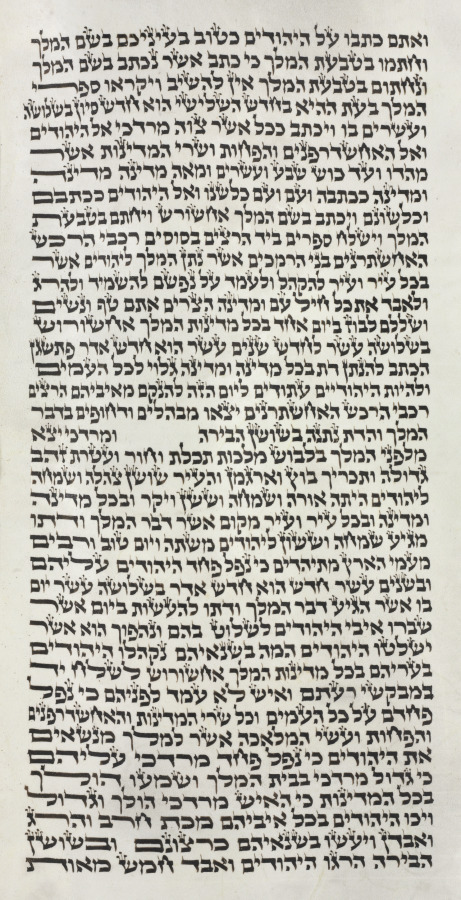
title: Scroll of Esther for the Purim Festival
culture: Europe (Eastern?), Hebrew, 19th century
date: c. 1850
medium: ink on vellum (eight columns, 39 lines of text on three membranes)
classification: Manuscript